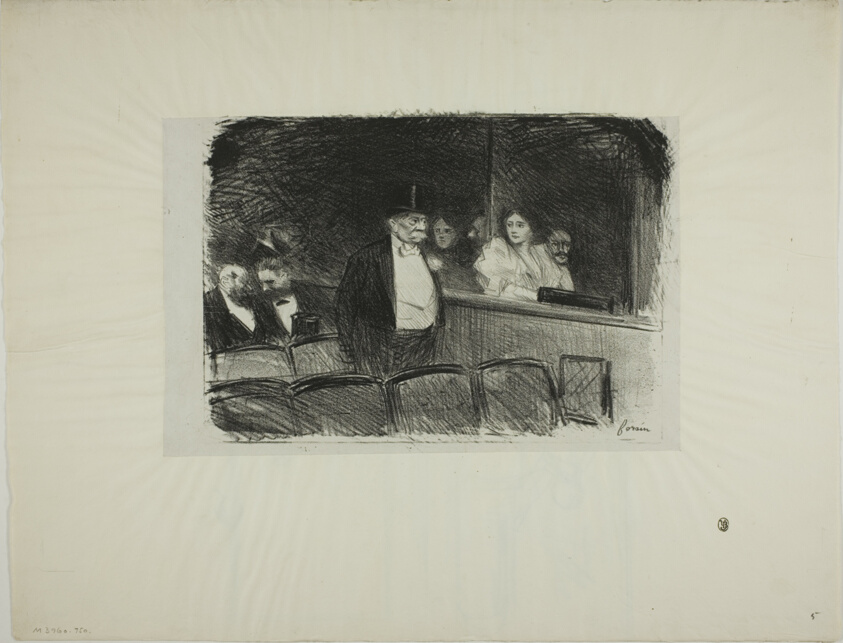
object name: Print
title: At the Theater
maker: Jean Louis Forain (French, 1852-1931)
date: c. 1892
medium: Lithograph on off-white China paper laid down on ivory laid paper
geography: France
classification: lithograph; print; prints and drawing